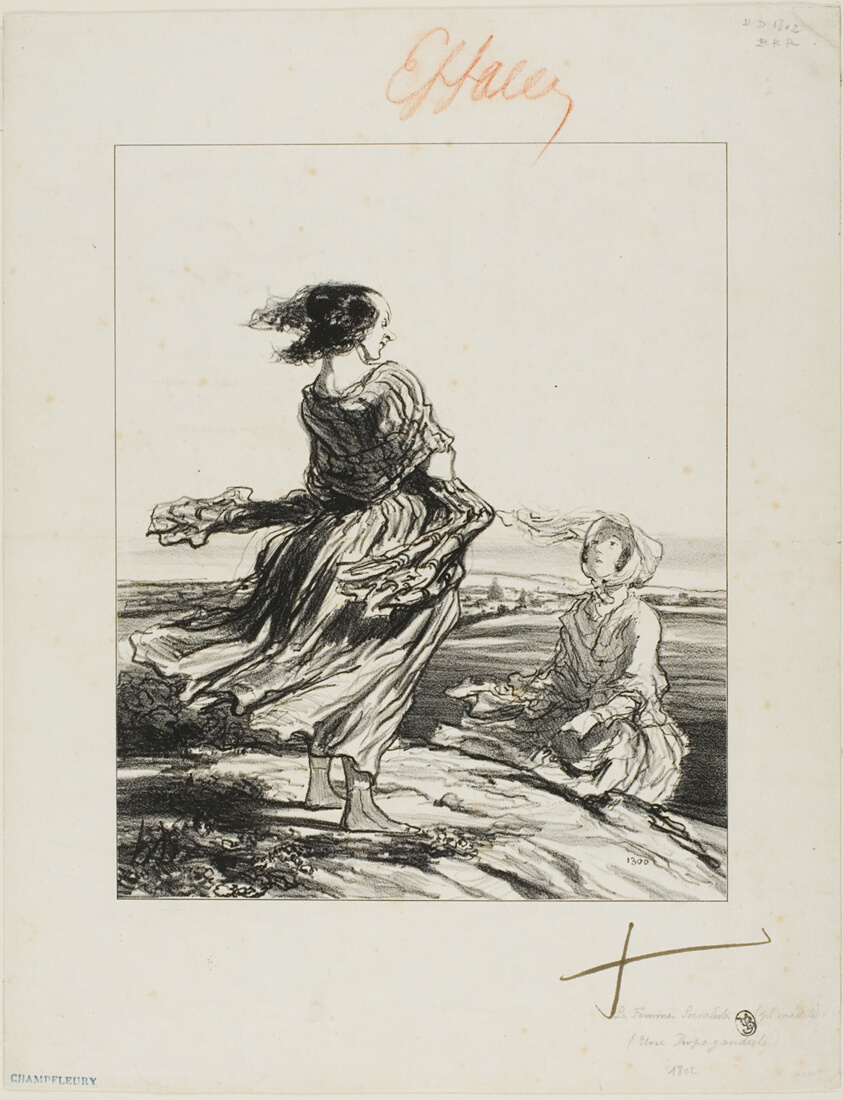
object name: Print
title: An Activist, from Les Femmes Socialistes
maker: Honoré Victorin Daumier; French, 1808-1879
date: 1849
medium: Lithograph on white wove paper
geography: France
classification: lithograph; print; prints and drawing